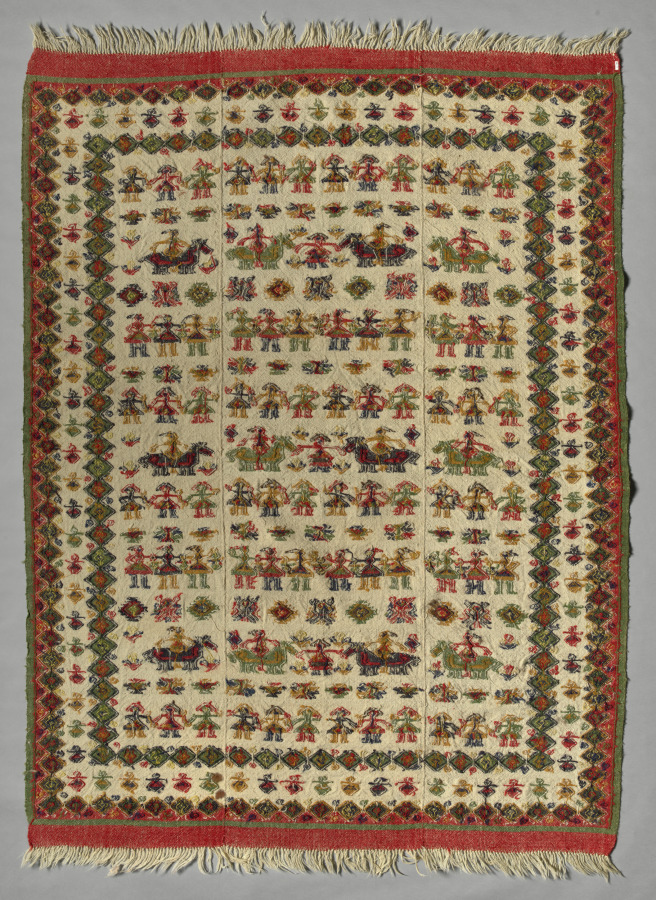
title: Blanket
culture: Greece, Crete, 19th century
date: 1800s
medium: wool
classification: Textile